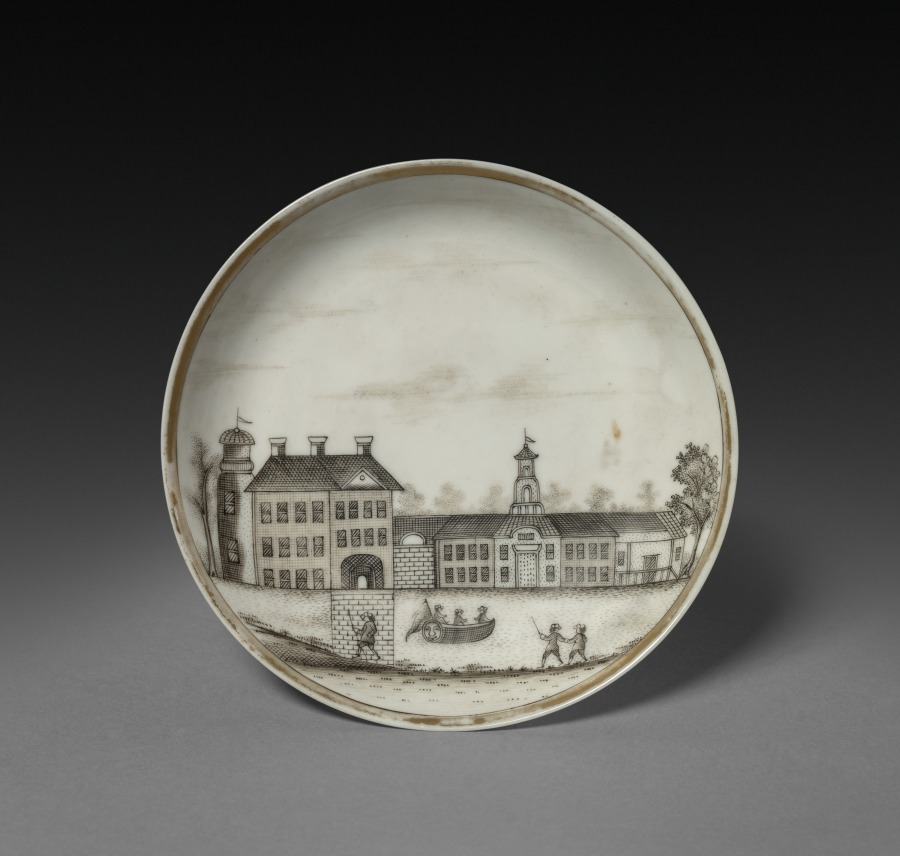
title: Saucer with View of Town (Cleves?)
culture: China, Chinese Export -- Continental Market, 18th century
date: c. 1770–1785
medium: porcelain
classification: Ceramic